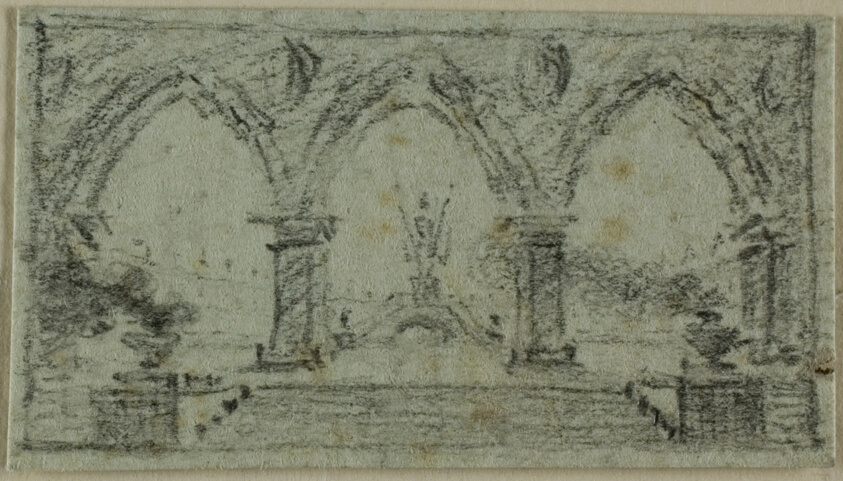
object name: Drawing and Watercolor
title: Porch with Gothic Arches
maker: Domenico Quaglio II; German, 1787-1837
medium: Graphite, on blue laid paper, tipped onto cream wove paper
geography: Germany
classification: graphite; drawings (visual works); prints and drawing